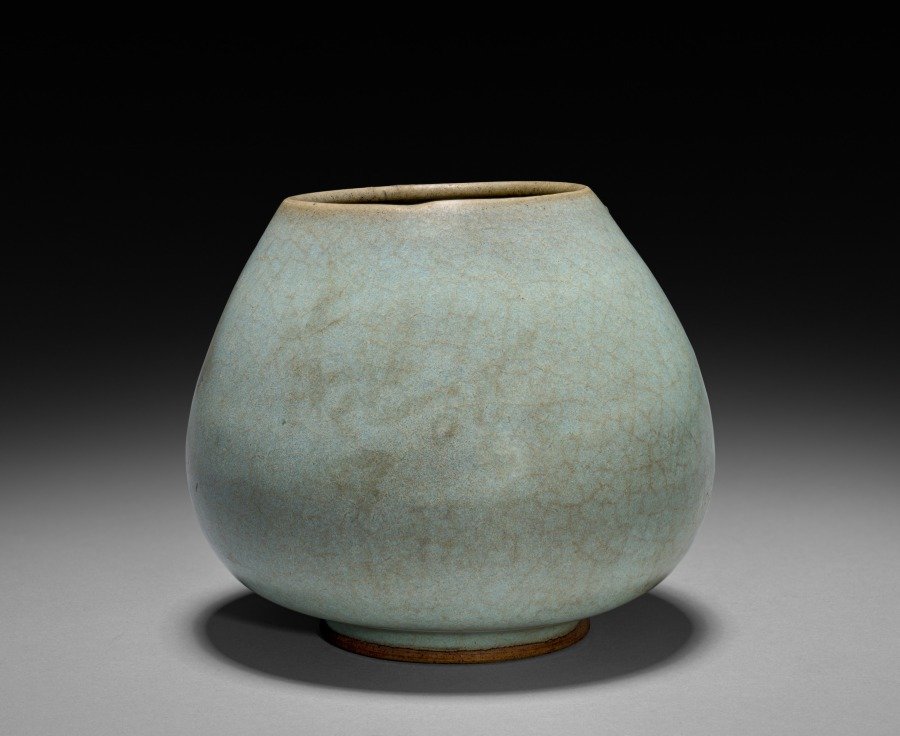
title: Lotus Bud Jar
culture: Northern China, Northern Song dynasty (960-1127) - Jin dynasty (1115-1234)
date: 1100s–1200s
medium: stoneware, Jun ware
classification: Ceramic